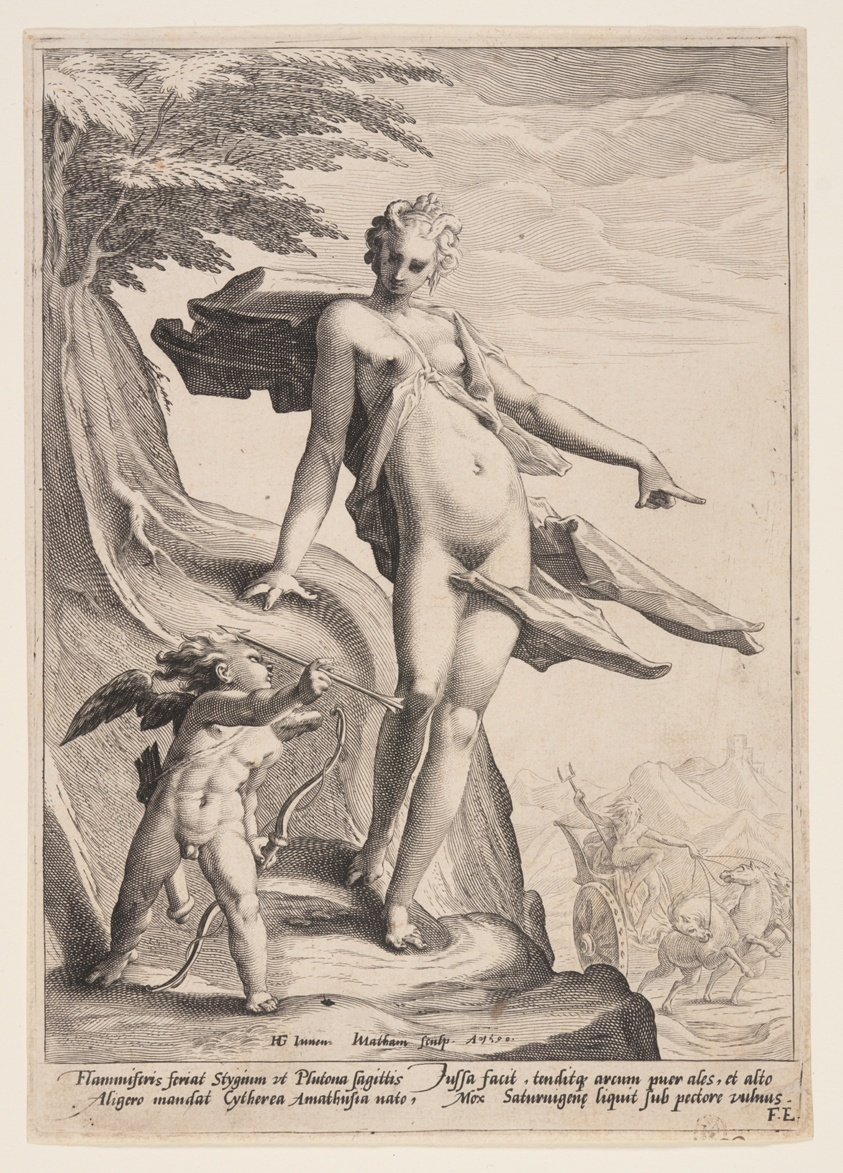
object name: Print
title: Venus, Cupid and Pluto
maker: Jacob Matham (Dutch, 1571–1631); after Hendrick Goltzius (Dutch, 1558–1617)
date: 1590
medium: Engraving on laid paper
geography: Netherlands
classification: print; engraving; paper; prints and drawing